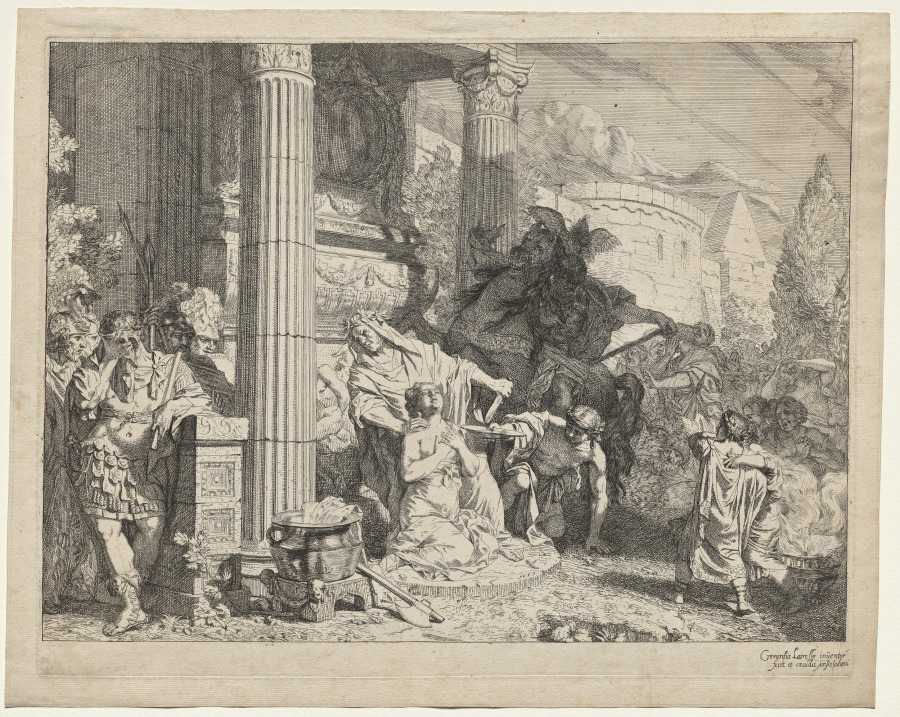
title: The Sacrifice of Polyxena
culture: Netherlands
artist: Gerard de Lairesse (Flemish, 1641–1711)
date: 1667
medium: etching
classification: Print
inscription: in plate: Gerardus Lairesse inventor/fecit et excudit Amstelodami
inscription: Inscription or possible description in what appears to be French on verso. Nearly illegible.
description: After the fall of Troy, the Trojan women were divided among the Greeks. Achilles arose from his grave and demanded that Polyxena, the daughter of King Priam and Queen Hecuba, be slain on his tomb in order to join him in the afterlife. Behind a blindfolded Polyxena who awaits her fate on a sacrificial altar in this image, Achilles appears in warrior’s garb on a rearing horse. Gerard De Lairesse’s figures are firmly modeled, and the space clearly defined with classical architecture, and reflect his interest in French art of the same period.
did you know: Gerard de Lairesse was called the “Dutch Poussin” for his role in bringing a French artistic style to the Netherlands in the late 1600s.